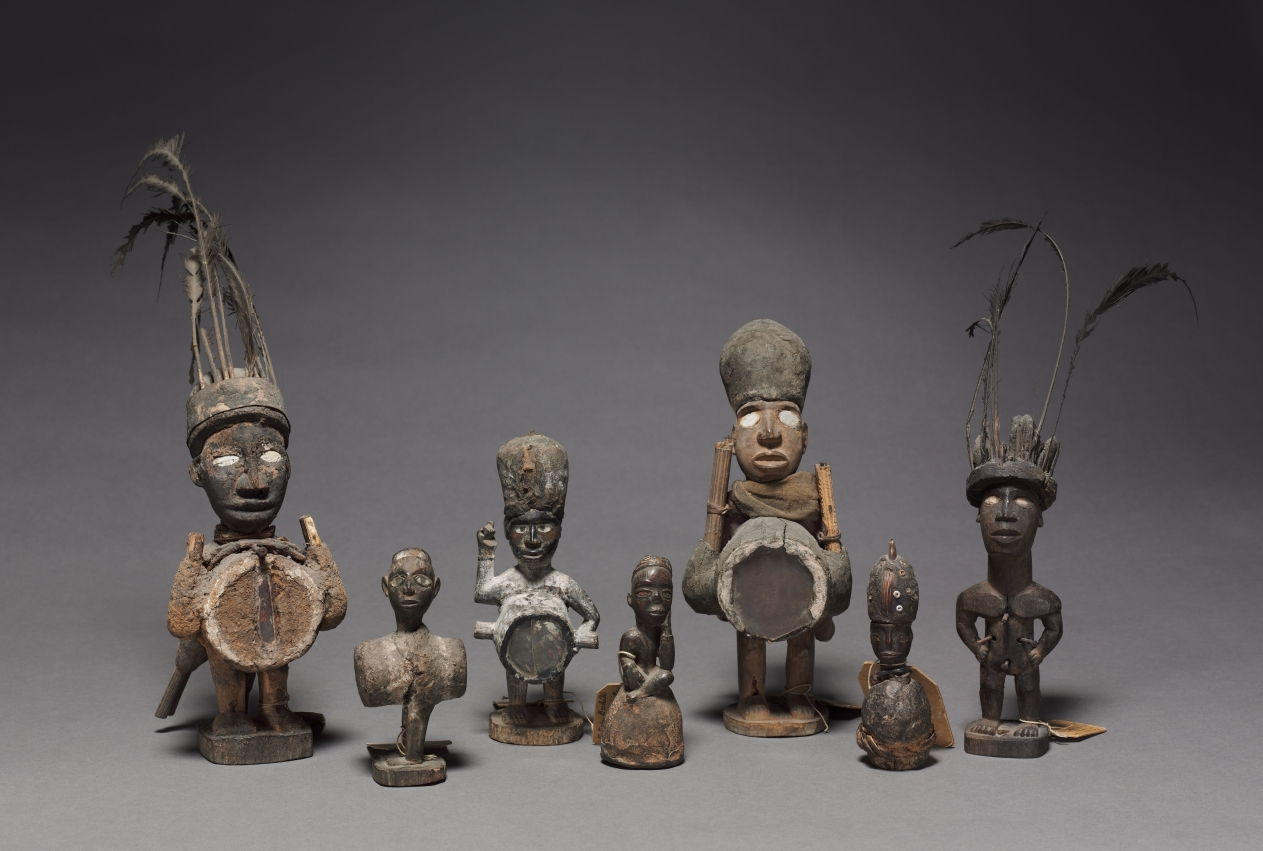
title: Power figure (nkisi)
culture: Africa, Central Africa, Republic of the Congo, Kongo-style maker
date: late 1800s–early 1900s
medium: Wood, feathers, organic material (including resin), iron, and possibly porcelain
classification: Sculpture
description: This figure had lost its nkisi load on the belly, but now shows how the mixture of earth, resin, leaves, glass, and other items was fixed onto the wooden figure, supported by four nails. It had been the property of “the sorcerer of Mboukou.”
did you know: This niksi figurine shows how the mixture of earth, resin, leaves, glass, and other items was fixed. It had been the property of “the sorcerer of Mboukou.”